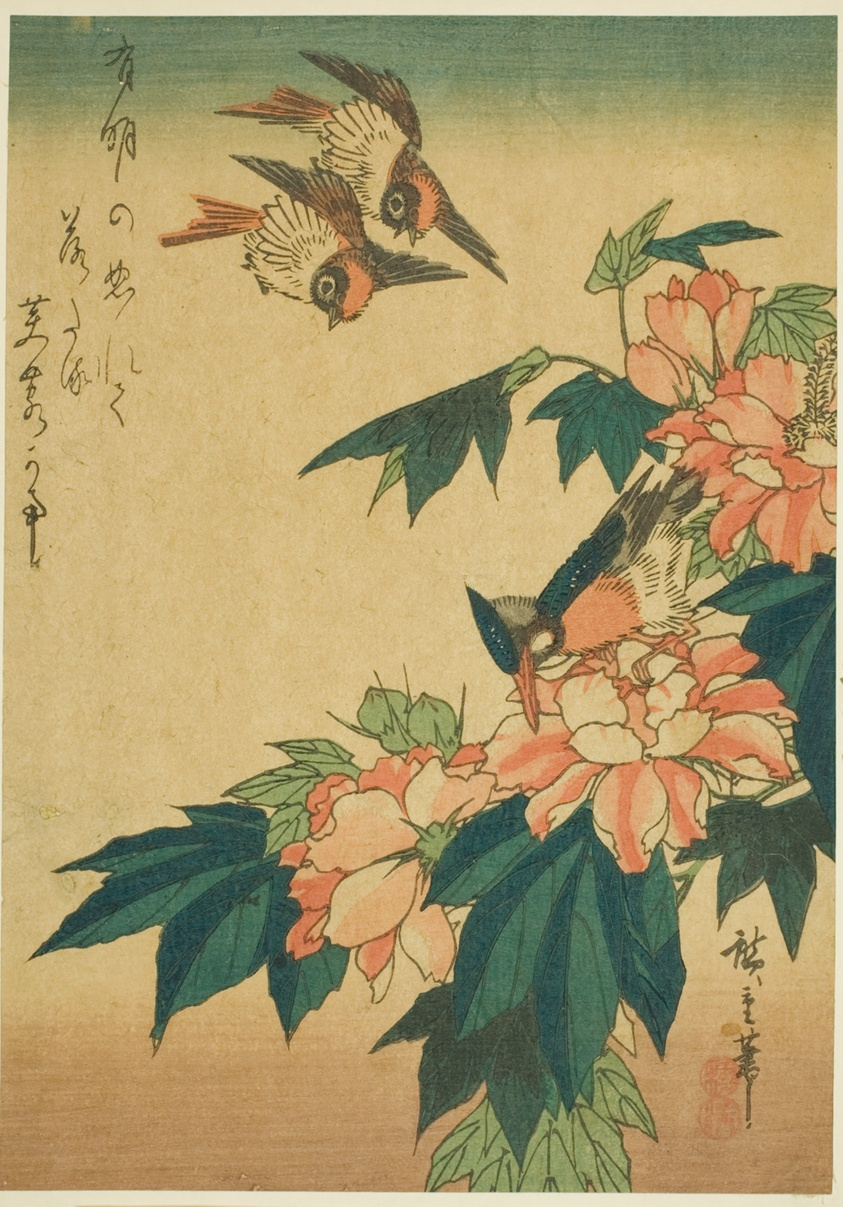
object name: Print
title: Swallows, kingfisher, and hibiscus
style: Japanese (culture or style)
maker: Utagawa Hiroshige 歌川 広重; Japanese, 1797-1858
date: c. 1830s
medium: Color woodblock print; chuban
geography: Japan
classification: woodblock print; print; asian art